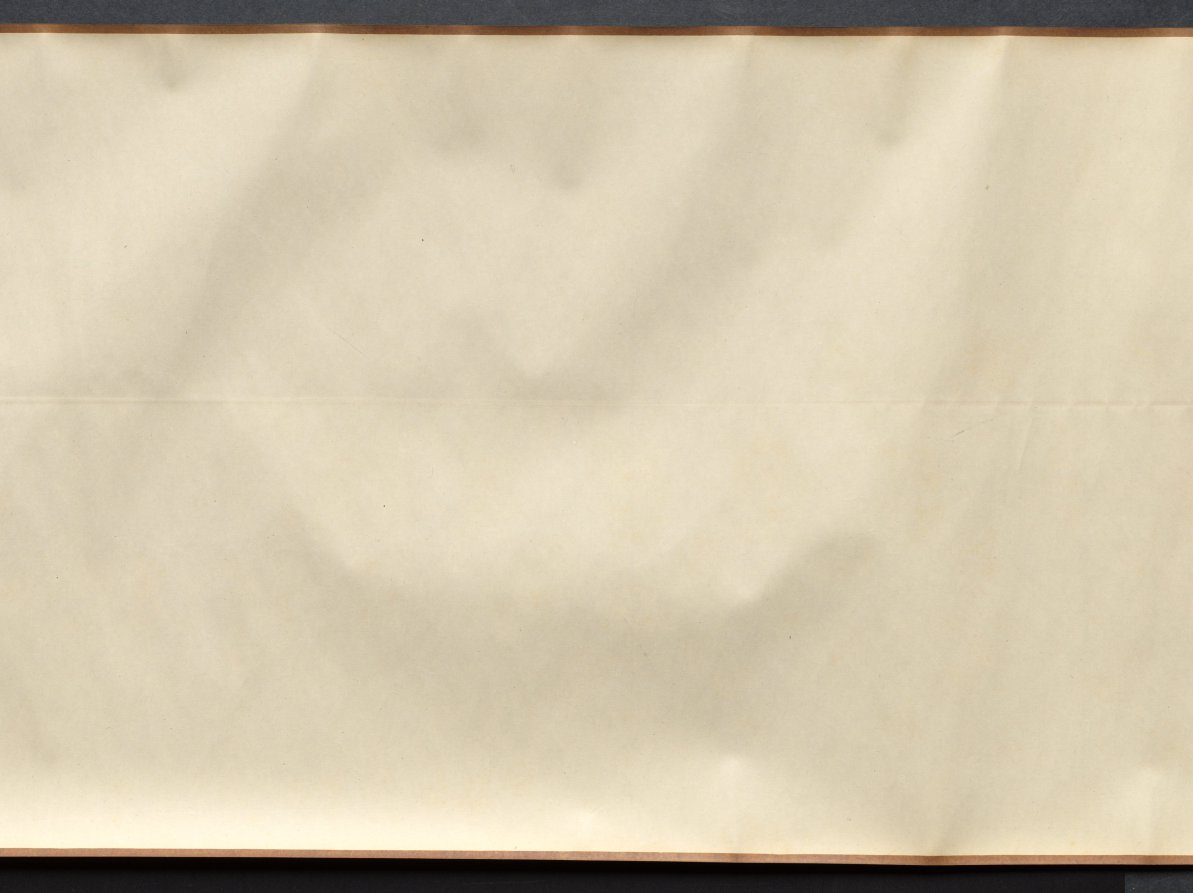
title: Returning to the Village in a Rainstorm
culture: China, Ming dynasty (1368–1644)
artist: Xie Shichen (Chinese, 1487–after 1567)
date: 1530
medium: Handscroll; ink and light color on silk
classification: Painting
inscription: 風雨歸村圖 嘉靖庚寅秋日樗仙謝時臣. [印] 謝時臣印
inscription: 3 additional seals unidentified.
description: This scroll depicts a wind- and rainswept landscape with figures in the countryside struggling against a late summer monsoon rainstorm. Such weather was familiar to residents of the lower Yangzi delta. Xie Shichen spent most of his life in the Suzhou area. Details of his career are scant, but his surviving works suggest that he made his living as a professional painter. This painting conveys drama and anecdotal observations, characteristic of Zhe school paintings, such as the one by Lü Wenying, CMA 1970.76.